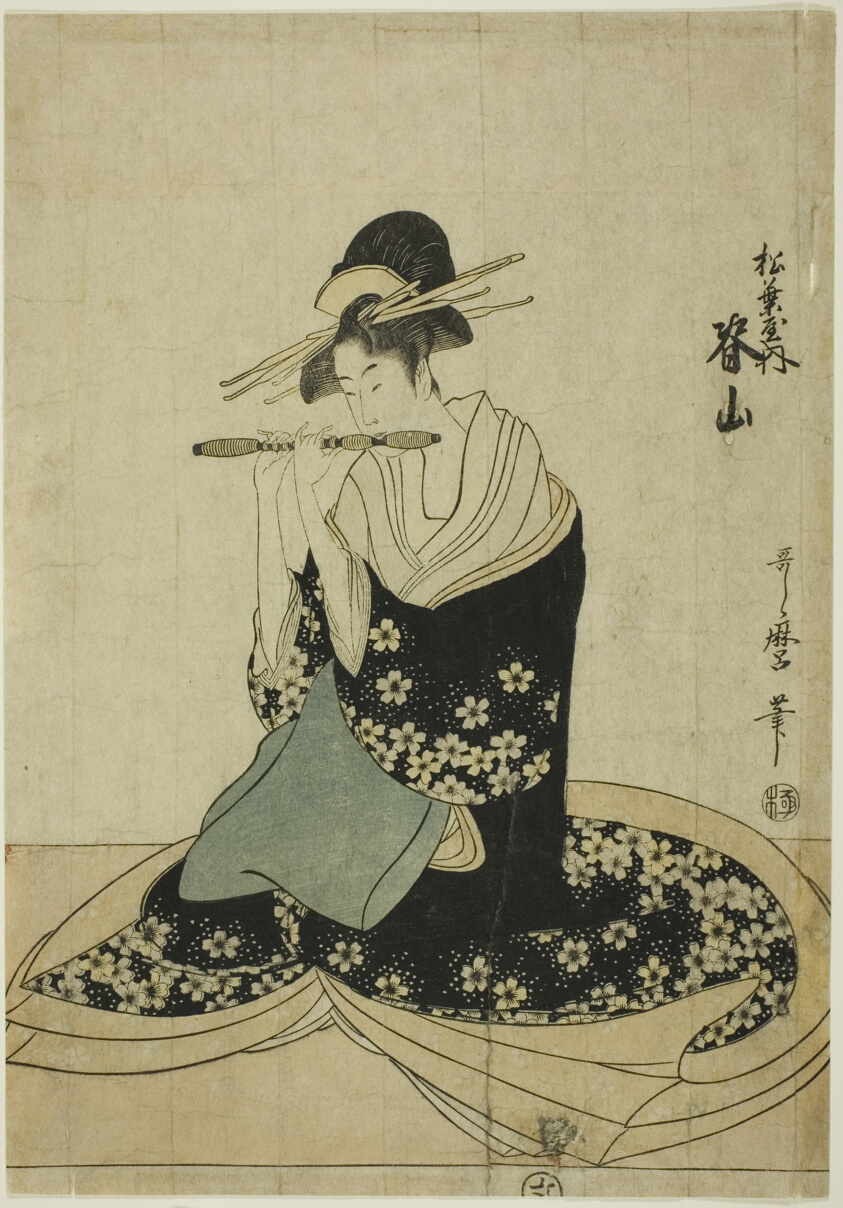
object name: Print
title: The Courtesan Seyama of the Matsubaya, from an untitled series of courtesans of the Matsubaya as five musicians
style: Japanese (culture or style)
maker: Kitagawa Utamaro 喜多川 歌麿; Japanese, 1753 (?)-1806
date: c. 1797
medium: Color woodblock print; oban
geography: Japan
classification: print; asian art